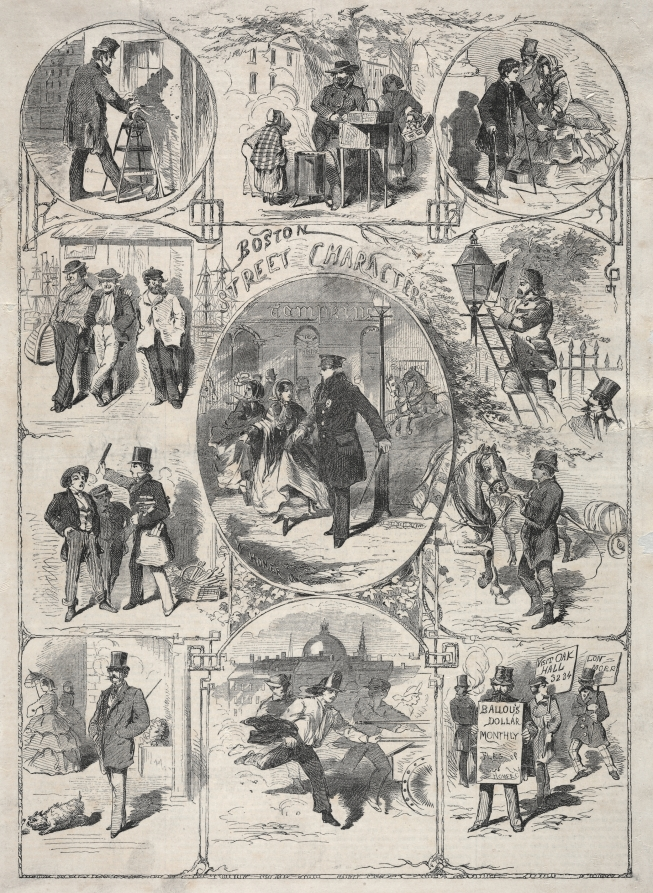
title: Boston Street Characters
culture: America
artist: Winslow Homer (American, 1836–1910)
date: 1859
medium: wood engraving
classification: Print